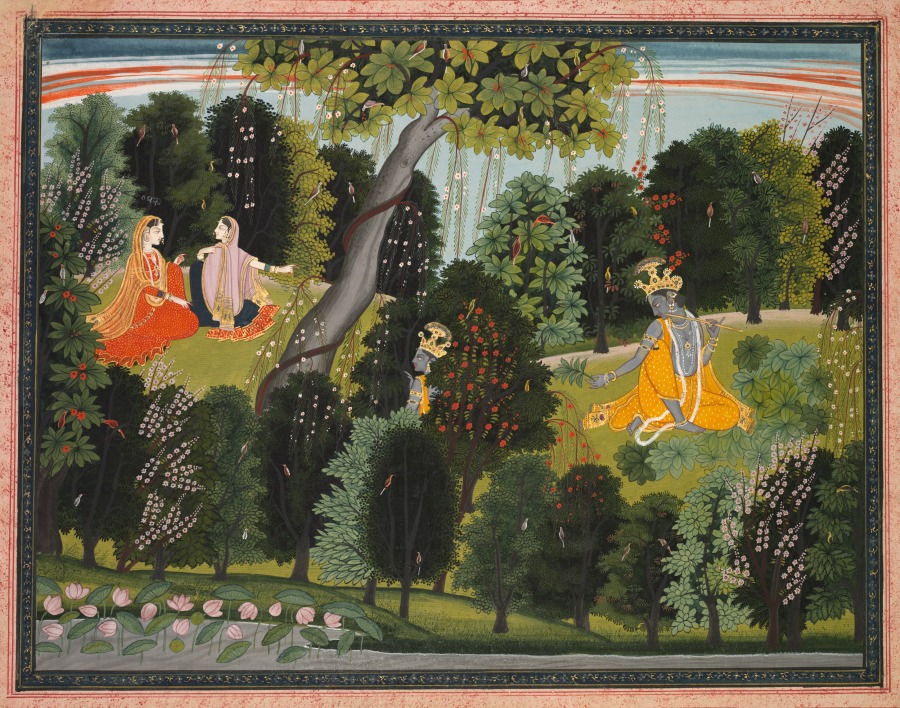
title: Sakhi persuades Radha to meet Krishna, from a Gita Govinda (Song of the Cowherd) of Jayadeva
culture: Northern India, Pahari kingdoms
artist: attributed to Purkhu (Indian, 1750–1860)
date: c. 1820–25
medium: gum tempera and gold on paper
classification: Painting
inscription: translation: "Yea Lady! in the self-same spot he waits Where with thy kiss thou taught'st him utmost love, And drew him, as none else draws, with thy look; And all day long, and all night long, his cry Is 'Radha, Radha' like a spell said o'er And in his heart there lives no wish nor hope Save only this, to slake his spirit's thirst For Radha's love with Radha's lips; and find Peace on the immortal beauty of thy breast. (What follows is the Music Gurjjari and the Mode Ekatali.) Mistress, sweet and bright and holy! Meet him in that place; Change his cheerless melancholy Into joy and grace; If thou hast forgiven, vex not: If thou lovest, go, Watching ever by the river, Krishna listens low: Listens low, and on his reed there Softly sounds thy name, Making even mute things plead there For his hope: 'tis shame That, while winds are welcome to him, If from thee they blow, Mournful ever by the river Krishna waits thee so! When a bird's wing stirs the roses, When a leaf falls dead, Twenty times he recomposes The flower-seat he has spread: Twenty-times, with anxious glances Seeking thee in vain, Sighing ever by the river, Krishna droops again. Loosen from thy foot the bangle, Lest its golden bell, With a tiny tattling jangle, Any false tale tell: If though fearest the moonlight Will thy glad face know, Draw those dark braids lower, Lady! But to Krishna go. Swift and still as lightning's splendour Let thy beauty come. Sudden, gracious, dazzling, tender, To his arms---its home. Swift as Indra's yellow lightning, Shining through the night, Glide to Krishna's lonely bosom, Take him love and light. Grant, at last, love's utmost measure, Giving the whole: Keep back nothing of the treasure Of thy priceless soul: Hold with both hands out unto him Thy chalice, let him drain The nectar of its dearest draught, Till not a wish remain. Only go---the stars are setting, And thy Krishna grieves; Doubt and anger quite forgetting, Hasten through the leaves: Wherefore didst thou lead him heav'nward But for this thing's sake? Comfort him with pity, Radha! Or his heart must break. But while Jayadeva writes This rare tale of deep delights--- Jayadev, whose heart is given Unto Jari, Lord in Heaven--- See that ye too, as ye read, With a glad and humble heed, Bend your brows before His face, That he may have bliss and grace."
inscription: poorva yatra sama tvaya rati patera sadita siddhayas tasminneva nikunja manmatha mahatirthe punar madhava. dhyayas tvam nisha japanna pita vaivalapa mantra vali. bhuyas tvat kucha kumbha nirbhara parirambhamta vanchati(1). gurjari rage. rati sukha sare gatambhisare madana manohara venam. na kuru nitambini gamana vilambanam anusara ta hridayesham (1). dhira samire yamuna tire vasati vane vanamali. gopi pina payodhara mardana chanchal kara yuga sali. nam sametam krita sanketam vadaya tem duveyum. bahumanu te tanu te tanu sangata pavana chalitamapi re end (2). patati patatre vicalati patre shankita-bhavad-upayanam rachayati shayanam sachakita-nayanam pashyati tava panthanam (3). mukharam adhira tyaja manjiram ripum iva keli sulolam chala sakhi kunja satimira-punja shilaya nila nicholam (4). urasi murarer upahita-hare ghana iva tarala balake taòid iva péte rati viparete rajasi sukata-vipake (5). vigalita-vasanam parihata-rasana ghauaya jaghanam apidhanam kisalaya-shayane pankaja-nayane nidhim iva harna-nidhanam (6). harir abhimane rajanir idanem iyam api yati viramam kuru mama vachana satvara-racana puraya madhuripu-kamam (7). shri-jayadeve kata-hari-seve bhaati paramaramaeyam pramuditahadaya harim atisadaya namata sukata kamaneyam (8)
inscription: 19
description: While all the cowherd girls were in love with Krishna, he had a favorite according to texts of the 1200s and later. Her name was Radha, and she and Krishna would meet for secret trysts in the forest, facilitated by her sakhi, or confidante. Krishna is shown twice in this painting. At the right he is in the process of making a bed of leaves for their upcoming encounter, and in the middle, he spies on Radha, wearing orange and gold. The sakhi is encouraging Radha to go and meet Krishna, since he is pining for her.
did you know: According to the text, Krishna softly plays his flute and weaves his beloved Radha's name into the melody.